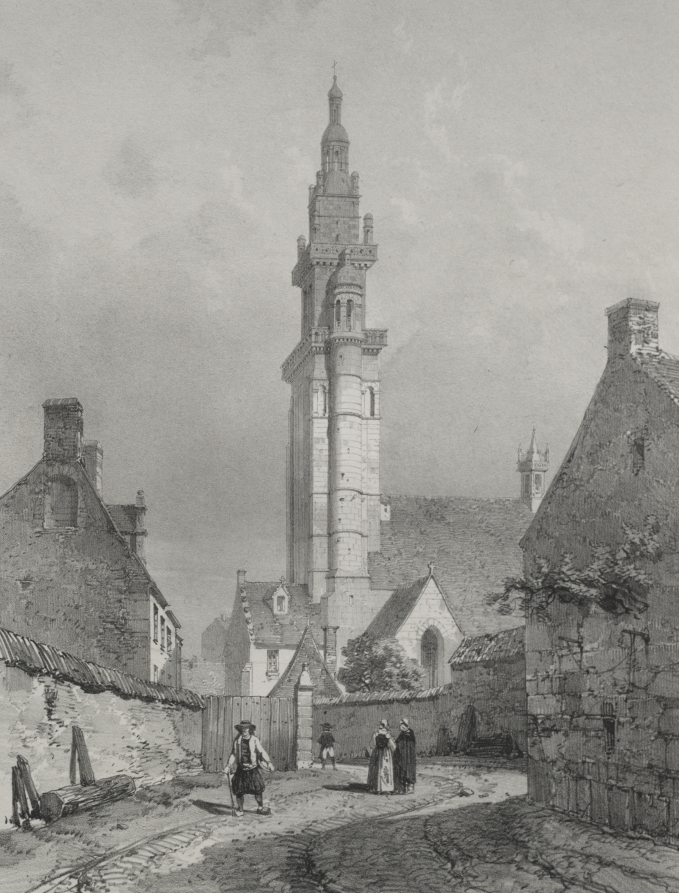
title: Voyages pittoresques et romantiques dans l'ancienne France. Bretagne: Eglise de Roscoff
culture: France, 19th century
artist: Eugène Cicéri (French, 1813–1890)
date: c. 1845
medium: lithograph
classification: Print